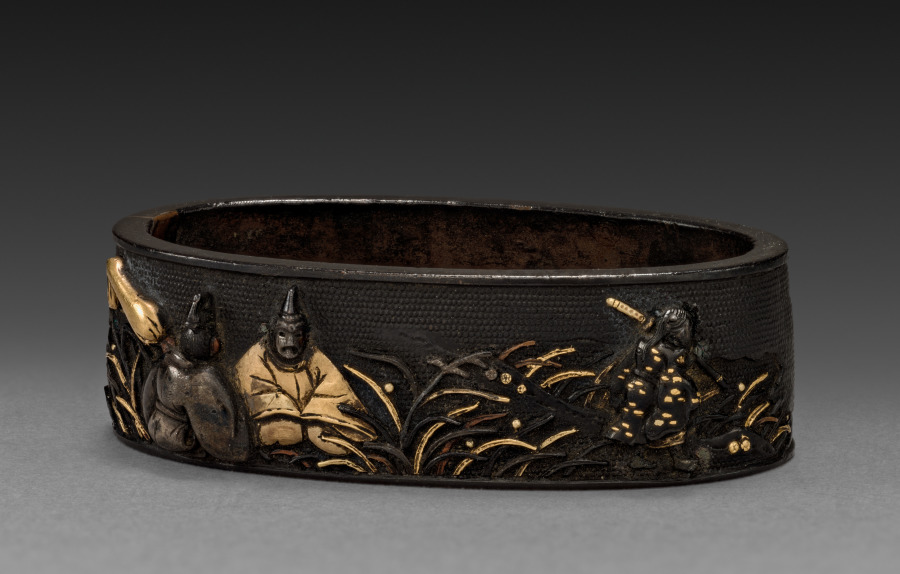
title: Sword-Hilt Collar (Fuchi)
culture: Japan, Edo period (1615–1868)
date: 1700–1850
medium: shakudo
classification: Arms and Armor